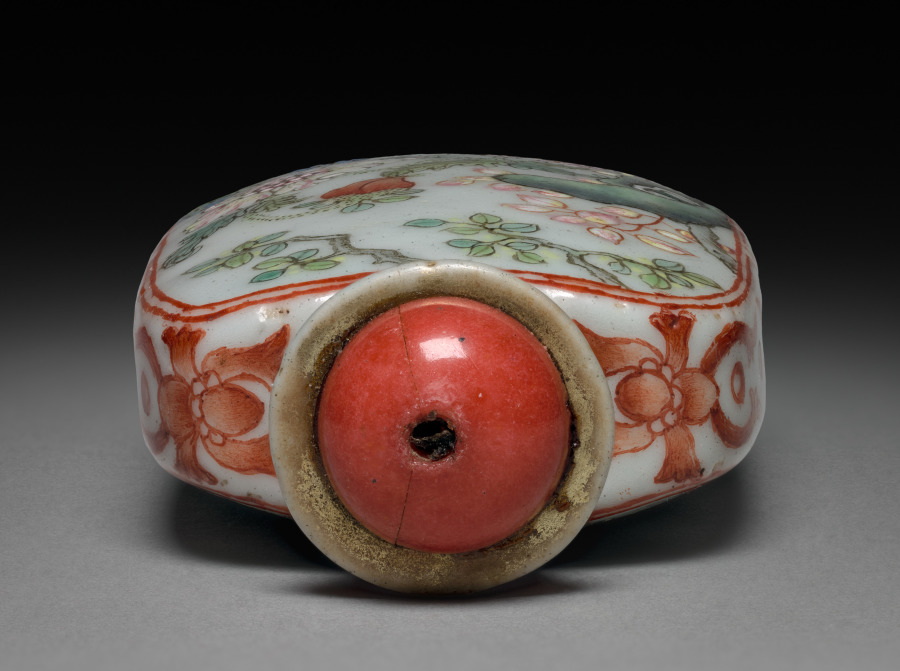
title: Snuff Bottle with Stopper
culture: China, Qing dynasty (1644–1911), Qianlong reign (1736–95)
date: 1736–95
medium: porcelain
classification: Ceramic